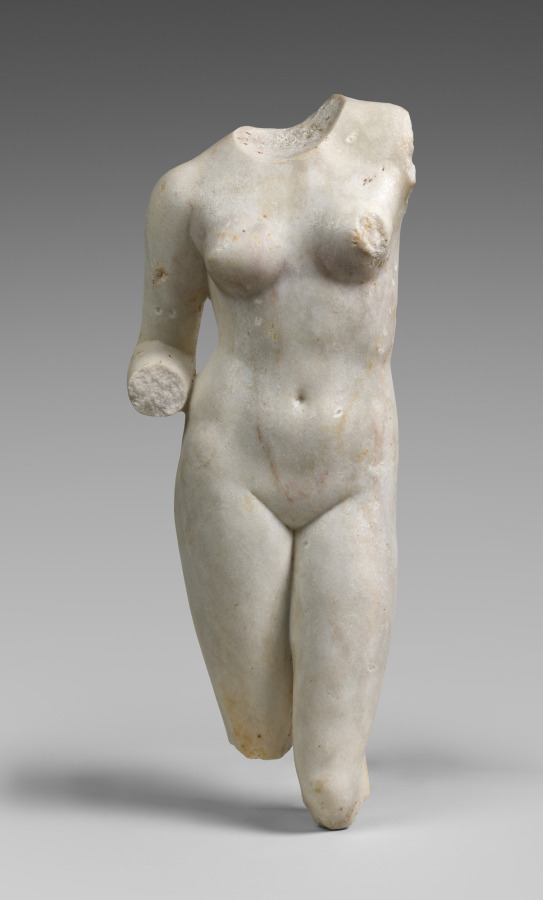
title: Torso of Venus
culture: Roman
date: 1–200 CE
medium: marble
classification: Sculpture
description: As avid collectors of Greek art, ancient Romans valued sculptures for their aesthetic qualities. This torso of Venus was likely inspired by the popularity of Praxiteles's nude Aphrodite from the Greek city-state of Knidos on the western coast of Asia Minor. Displayed in a circular shrine, it became one of the most celebrated sculptures in classical antiquity.